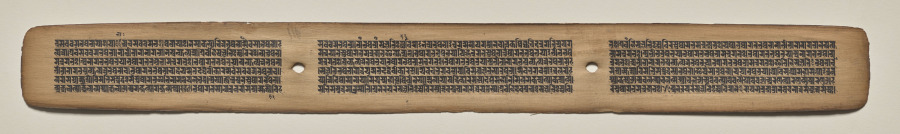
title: Text, Folio 109 (recto), from a Manuscript of the Perfection of Wisdom in Eight Thousand Lines (Ashtasahasrika Prajnaparamita-sutra)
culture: Eastern India, Bihar, Vikramashila Monastery. Painting: Nepal, Kathmandu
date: Sunday, September 14, 1119 (year 239 of the Newar Samvat in the month of Ashvina)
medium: gum tempera and ink on palm leaves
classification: Painting